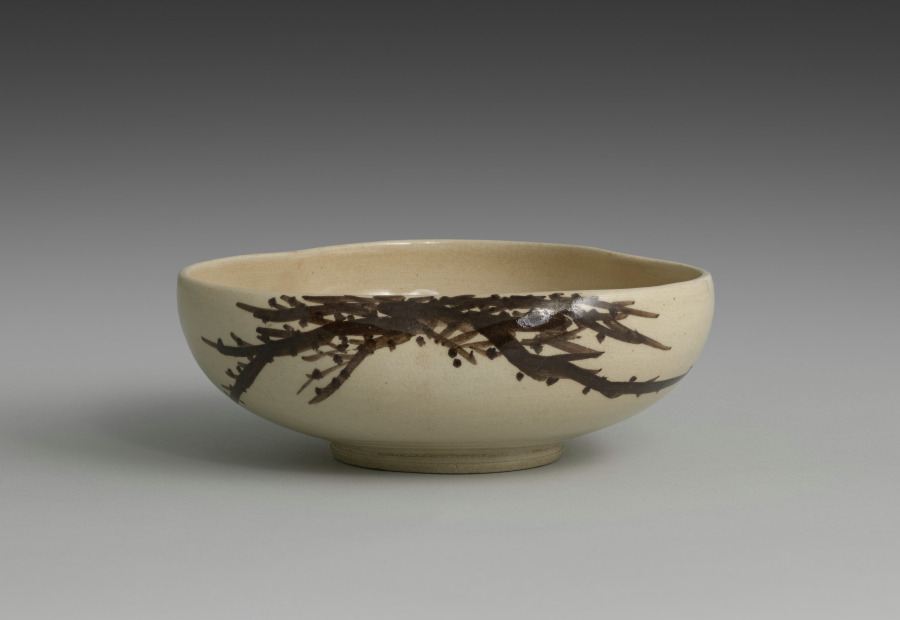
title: Pine-shaped Dish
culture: Japan, Meiji period (1868–1912)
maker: Seifū Yohei III (Japanese, 1851–1914)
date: 1893–1914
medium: Stoneware with underglaze iron oxide and crackled glaze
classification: Ceramic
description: The clever design on this stoneware Awata-style dish makes use of the interior and exterior surfaces to present a close-up view of pine needles on the branch painted in underglaze iron oxide. The branch is shown on the outside of one side of the dish, while the needles fan out across the inside. The entire dish, when seen from above, reveals a shape resembling the mushroom cap–like motif appearing in textile designs and in classical Japanese paintings called Yamato-e to represent pine trees.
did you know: Awata ware, named for the area of Kyoto where it was historically produced, is considered a subset of Kyoto ware. It is characterized by a very light brown body with a transparent crackled glaze.